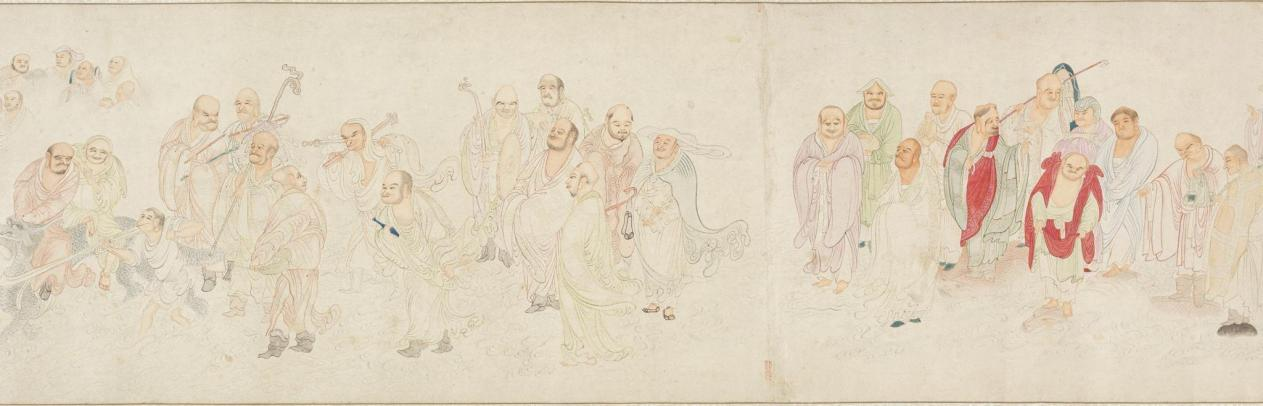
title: The Hermit Xu You Resting by a Stream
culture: China, Ming dynasty (1368–1644)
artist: Dai Jin (Chinese, 1388–1462)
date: 1400s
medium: Hanging scroll; ink and slight color on silk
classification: Painting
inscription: 5 seals: 1 of Huang Lin 黄琳 (active about 1496–1532); 4 unidentified.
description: Xu You, a recluse who refused the throne offered to him by legendary Emperor Yao, chose instead to farm on Mount Ji. Sitting under cliffs, his left arm resting on his risen leg and his loose robe revealing his belly, he displays a nonchalant attitude. Xu You is wearing a laborer’s outfit, a short robe and tight leggings, while his composed pose and gentle features reveal his lofty character. The composition shows rising mountains on the left juxtaposed by open space on the far right. Powerful brushstrokes and nuanced ink washes follow the style of the Southern Song (1127–1279) academy painters.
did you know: When the emperor offered him a post overseeing the Nine Territories (as China was known in ancient times), Xu You went to the River Ying to cleanse his ears from such an unwelcome proposition.